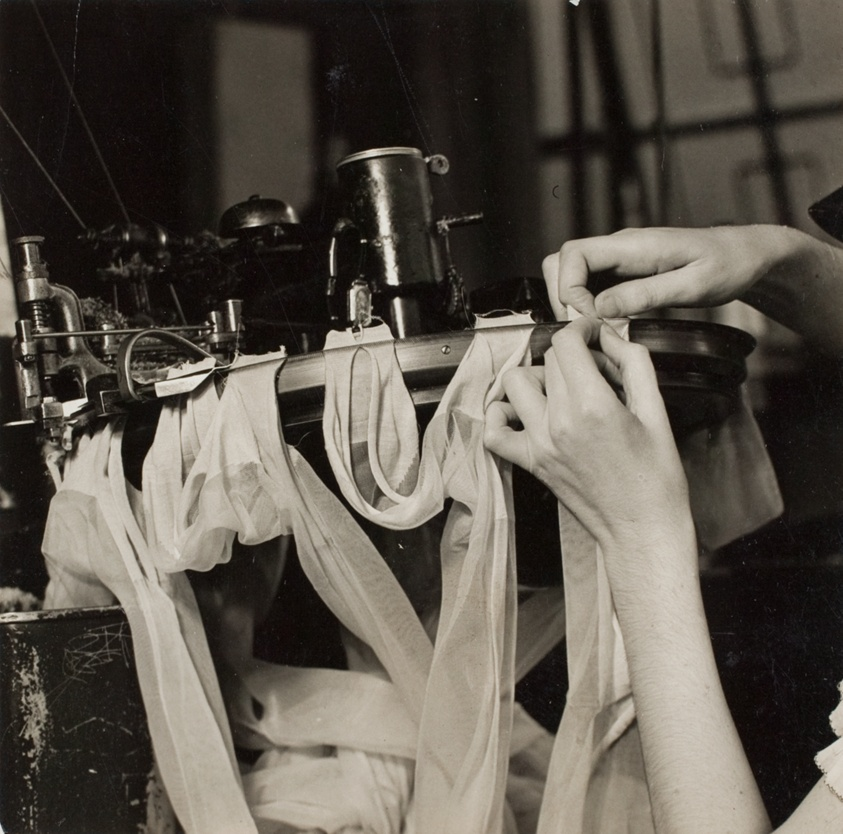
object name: Photograph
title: Hosiery Worker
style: Photo League, 20th Century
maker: Lewis Wickes Hine (American, 1874–1940)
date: 1937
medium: Gelatin silver print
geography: United States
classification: photograph; photography